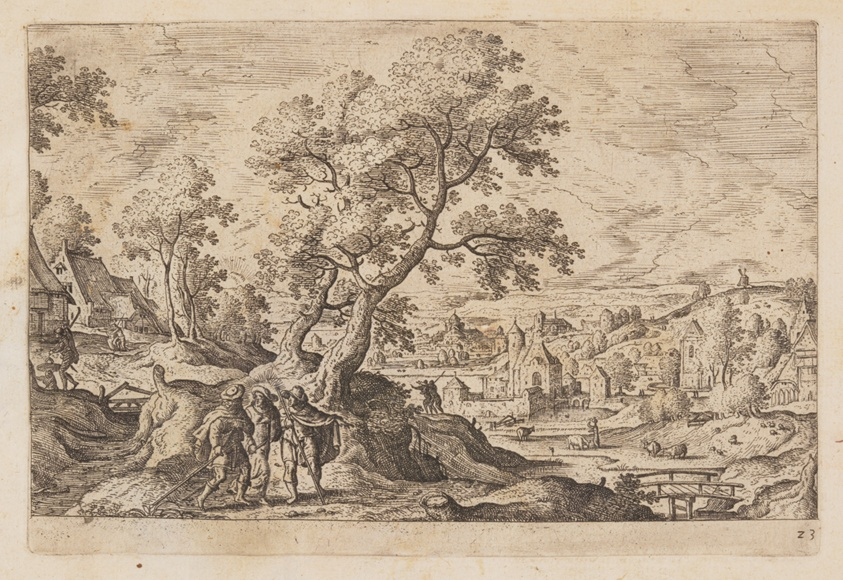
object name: Print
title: Plate 23, from Landscapes with Scenes from the Old and New Testament and Ovid’s Metamorphoses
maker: Hans Bol (Flemish, 1534–1593); published by Philip Galle (Flemish, 1537–1612)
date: 1574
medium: Etching on ivory laid paper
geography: Flanders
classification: print; paper; prints and drawing; etching